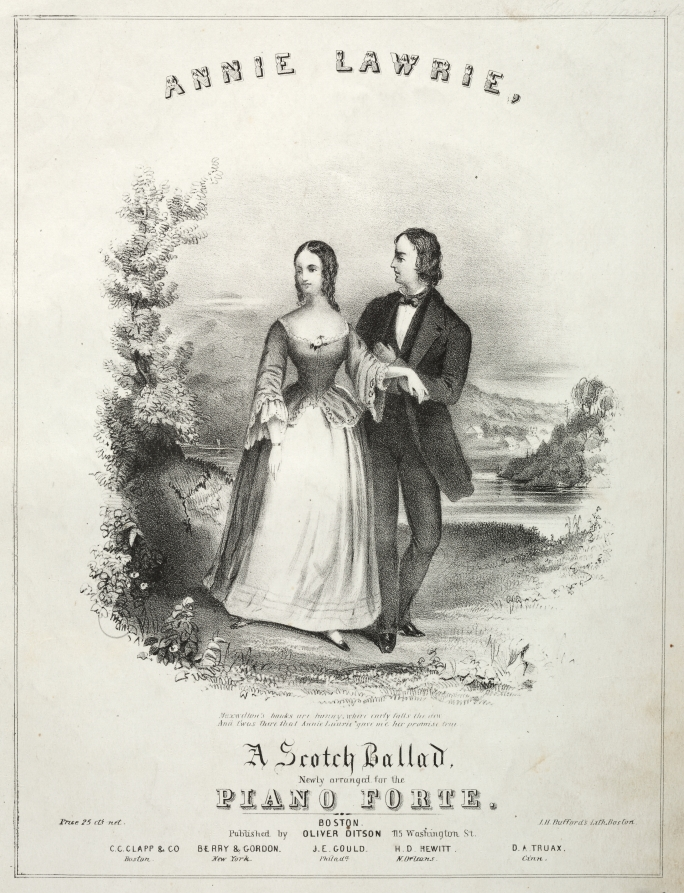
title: Annie Laurie - Sheet Music Cover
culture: America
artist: Winslow Homer (American, 1836–1910)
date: c. 1855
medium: lithograph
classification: Print